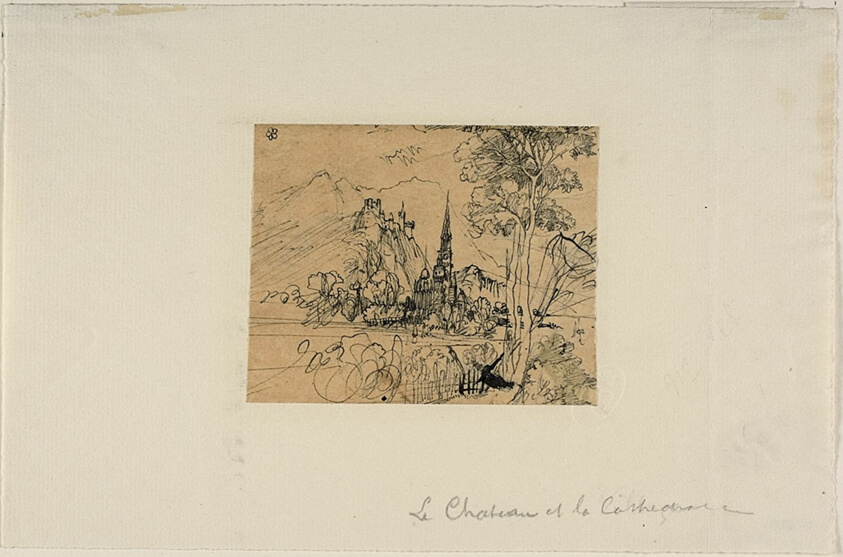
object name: Drawing and Watercolor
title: The Château and the Cathedral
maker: Rodolphe Bresdin (French, 1825-1885)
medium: Pen and black ink, on tan tracing paper, laid down on ivory laid paper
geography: France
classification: pen and ink drawings; drawings (visual works); prints and drawing